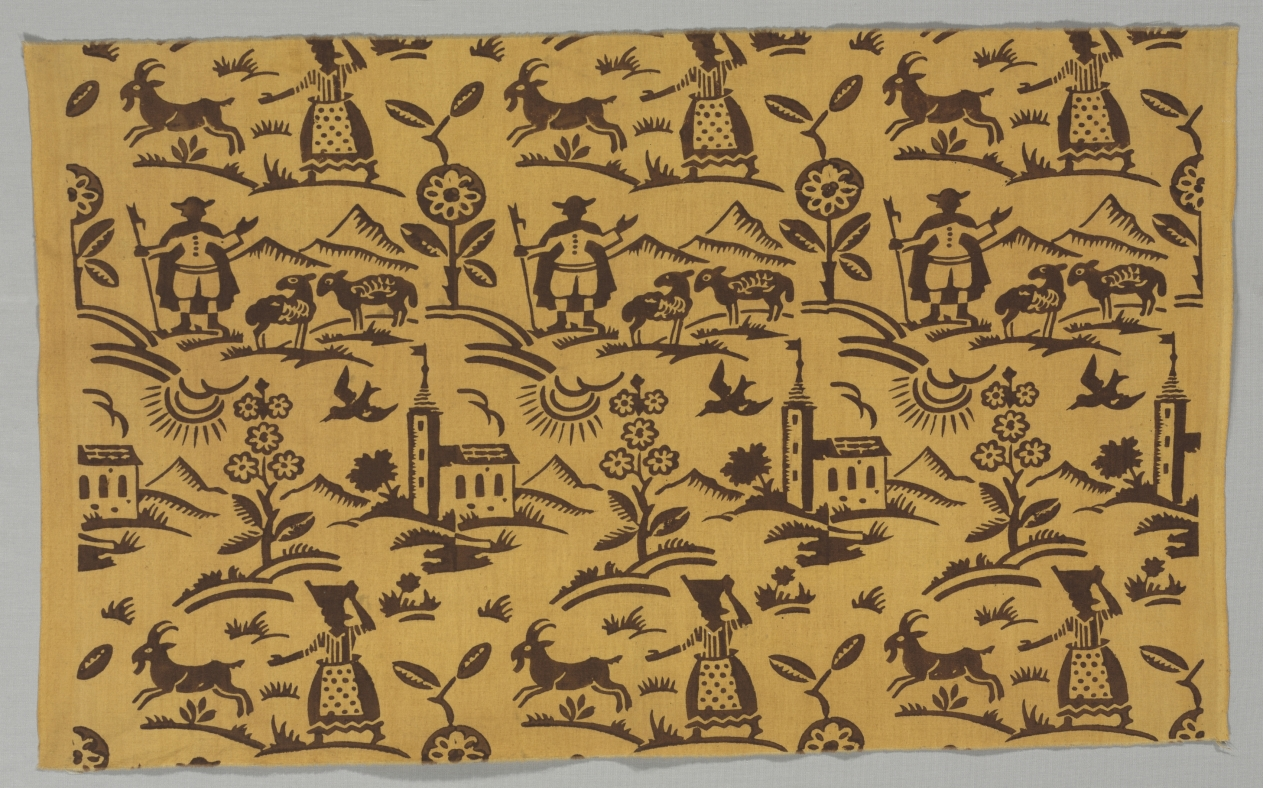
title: Textile Fragment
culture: Germany, Munich, 20th century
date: 20th century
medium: plain weave cotton, printed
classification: Textile